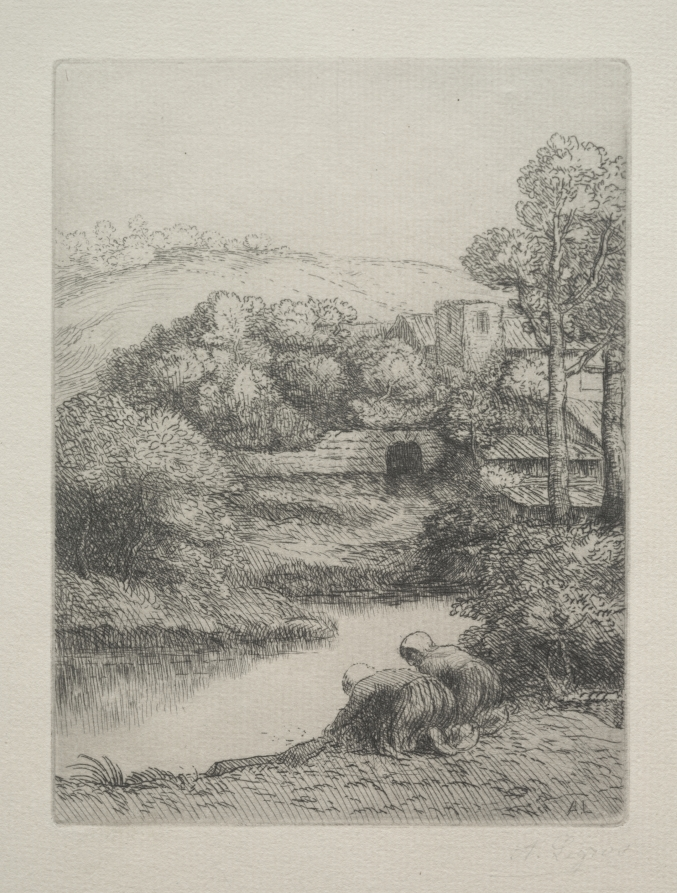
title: The Wash House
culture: France, 19th-20th century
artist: Alphonse Legros (French, 1837–1911)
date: c. 1857–1911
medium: etching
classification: Print